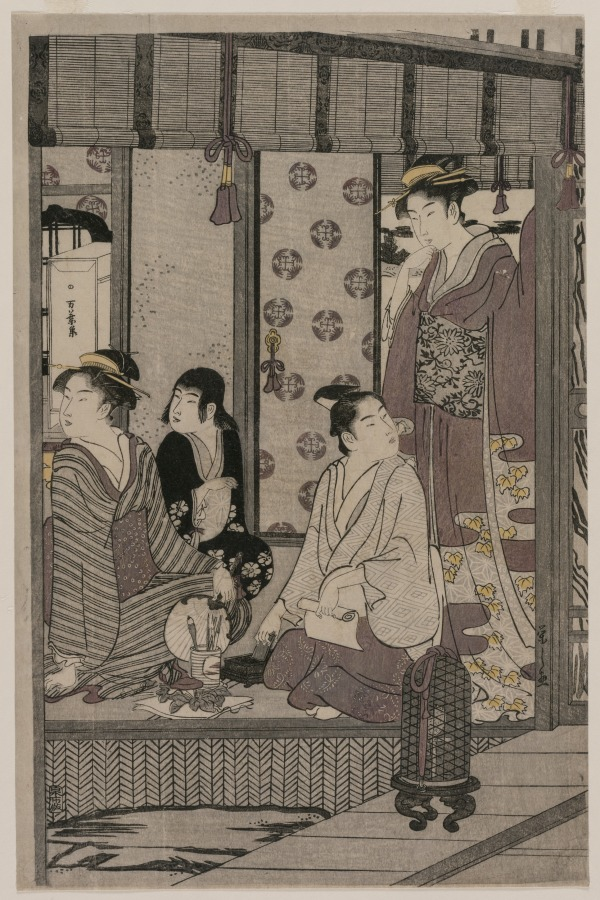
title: Morning Glory (from the series The Tale of Genji in Elegant Modern Dress)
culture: Japan, Edo period (1615–1868)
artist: Chōbunsai Eishi (Japanese, 1756–1829)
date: c. 1790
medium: color woodblock print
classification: Print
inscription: Signature: Eishi ga